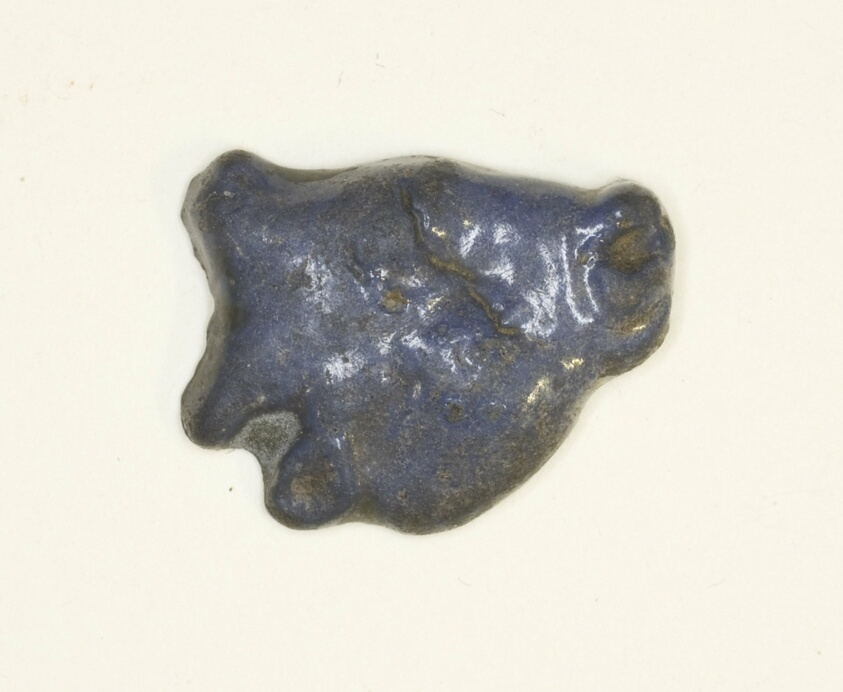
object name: Costume and Accessories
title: Foundation Deposit: Ox Head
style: new kingdom, twentieth dynasty, nineteenth dynasty, eighteenth dynasty, egyptian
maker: Egyptian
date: New Kingdom, Dynasties 18–20 (about 1550–1069 BCE)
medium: Faience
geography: Egypt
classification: amulet; votive offering; ancient art; faïence (composite material)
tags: cows, animals, sacrifice, food